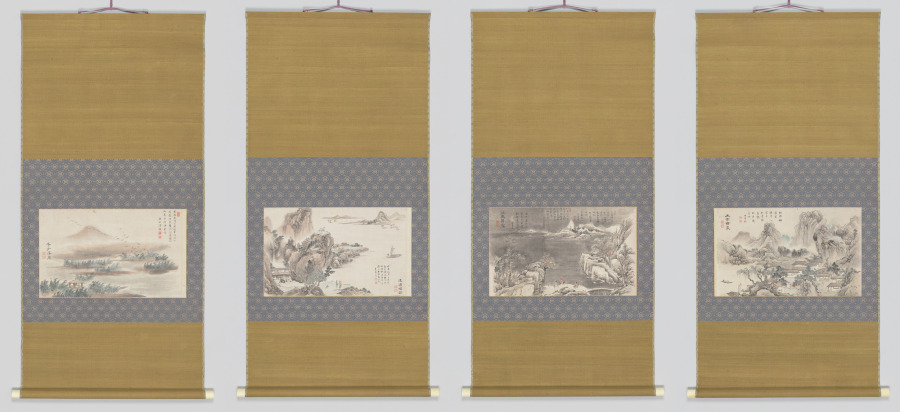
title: Four Motifs from the Eight Views of Xiao-Xiang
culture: Japan, Edo period (1615–1868)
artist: Tani Bunchō (Japanese, 1763–1841)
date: 1788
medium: Four album leaves from a set of eight remounted as hanging scrolls; ink and color on paper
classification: Painting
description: These paintings were part of a set of album leaves representing the Eight Views of Xiao-Xiang, a theme originating in Chinese poetry and painting that spread to both Korea and Japan. Southern China’s Xiao-Xiang area, where the mist-covered banks of the Xiang River created a complex landscape shifting like the moods and minds of people, captured the imaginations of generations of painters and calligraphers. Inscriptions on these works suggest that they were possibly ordered by newly prominent Japanese Confucian scholars.